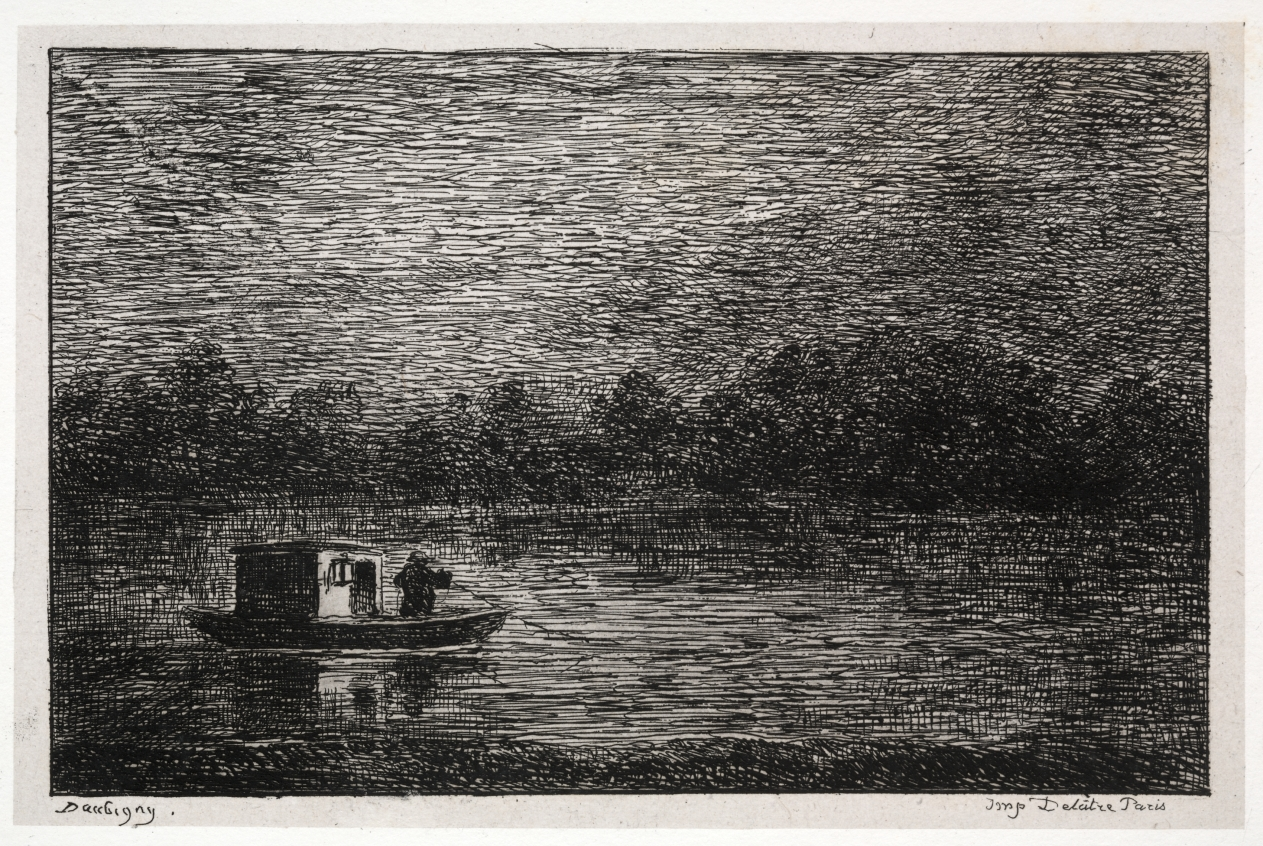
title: The Boat Trip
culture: France, 19th century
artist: Charles François Daubigny (French, 1817–1878)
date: 1861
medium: 16 etchings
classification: Portfolio